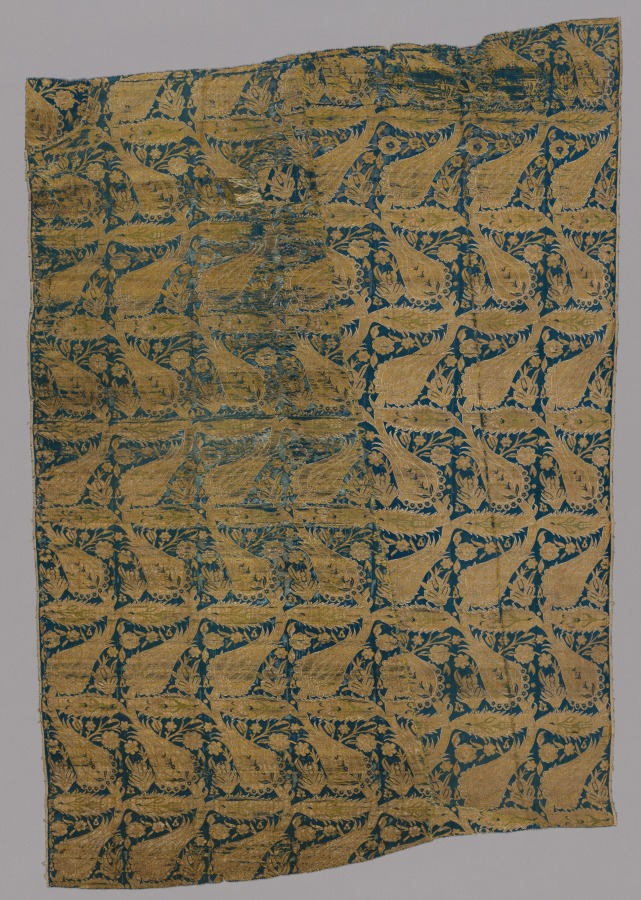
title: Lampas with compressed undulating vines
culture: Turkey, Bursa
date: early 1600s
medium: lampas: silk and gilt-metal thread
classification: Textile